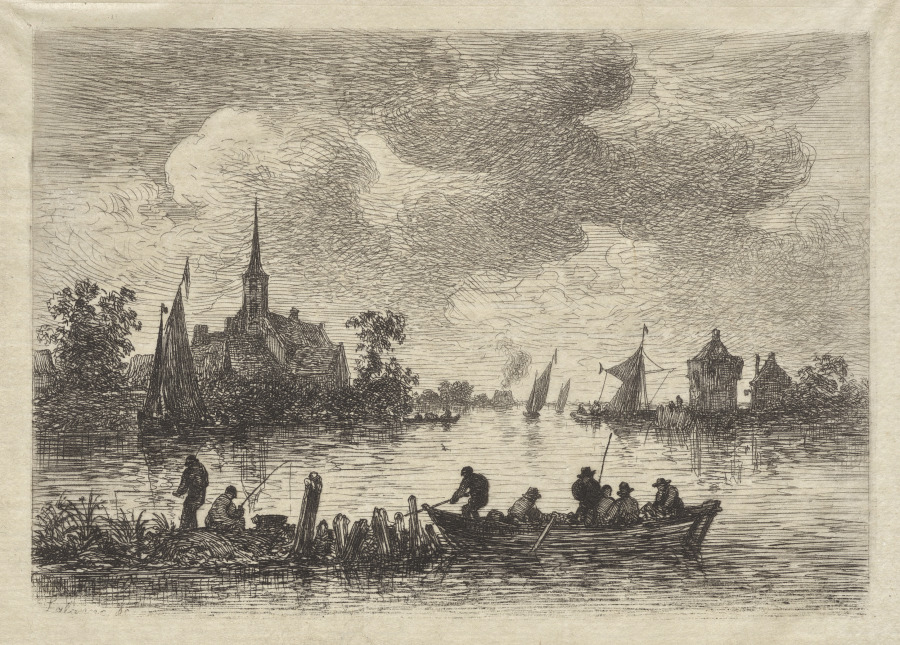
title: Banks of the Meuse (Bords de la Meuse)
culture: France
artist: Maxime Lalanne (French, 1827–1886)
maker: after Jan van Goyen (Dutch, 1596–1656)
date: 1873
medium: etching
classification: Print